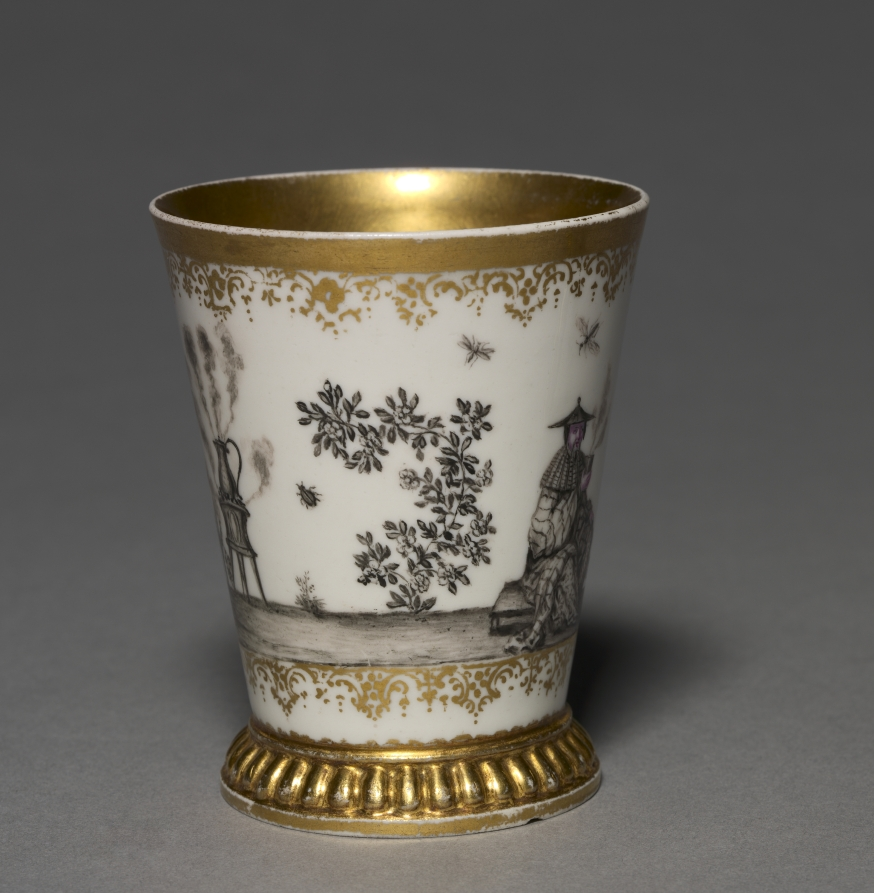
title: Beaker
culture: Germany, Meissen, early 18th century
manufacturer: Meissen Porcelain Factory (German, est. c. 1710)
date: before 1720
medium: porcelain, interior gilded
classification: Ceramic